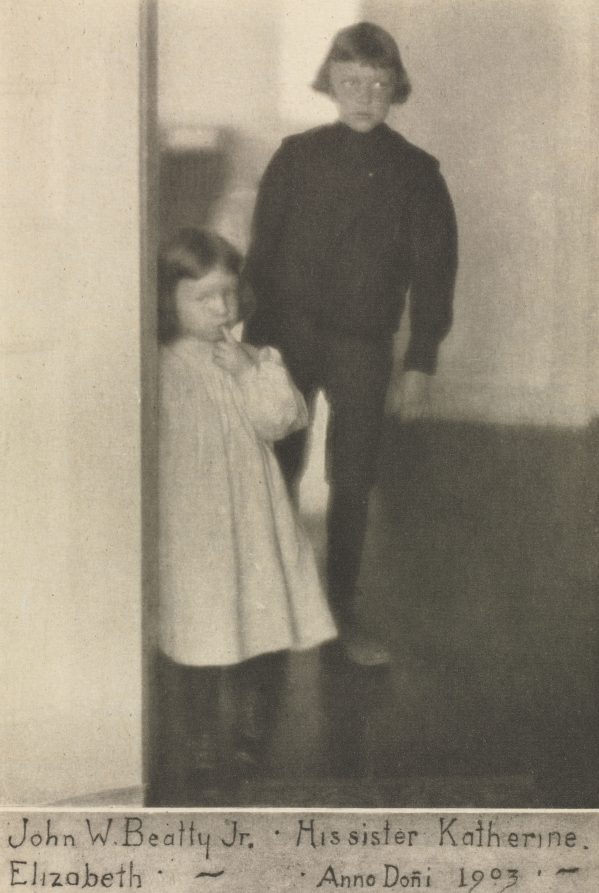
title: Camera Work: The Beatty Children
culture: America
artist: Clarence H. White (American, 1871–1925)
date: 1905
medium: photogravure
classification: Bound Volume